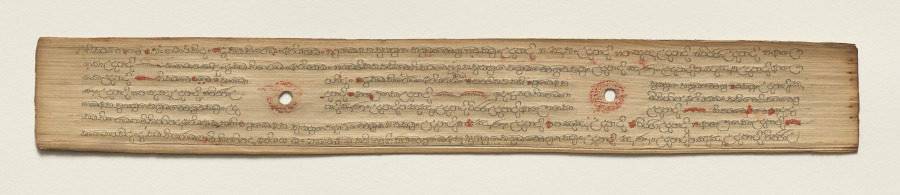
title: Leaf from a Buddhist Manuscript (verso)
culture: Sri Lanka, Singhalese, Late 17th century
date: c. 1700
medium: fiber paper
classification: Manuscript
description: Palm leaf material is still used for manuscripts in Sri Lanka. The palm leaves are prepared first by boiling them, drying them in the sun, and then rubbing them with oils. Scribes then use a metal stylus to incise the text. Then charcoal powder is wiped across the pages, filling in only the inscribed lines.